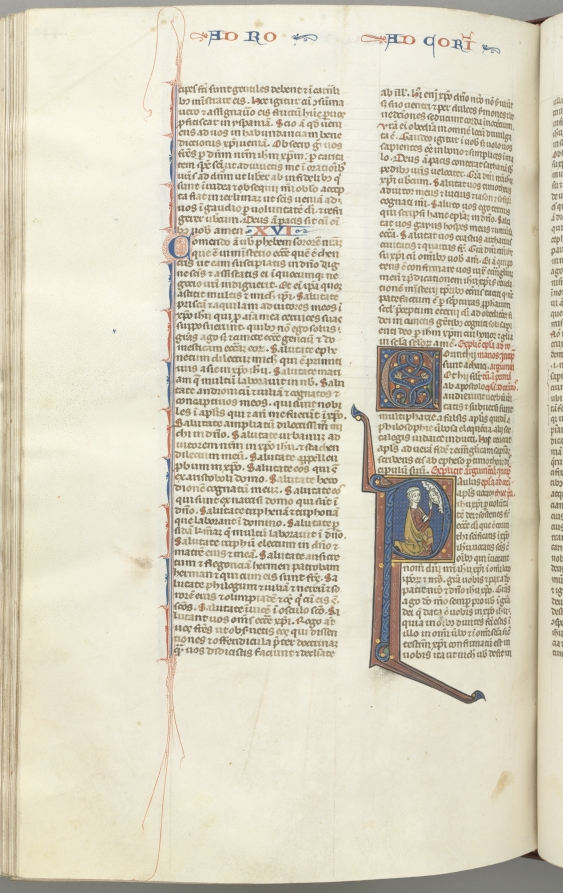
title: Fol. 440v, Corinthians I, historiated initial P, Paul kneeling talking to the bust of God above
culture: Southern France, Toulouse(?), 13th century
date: c. 1275–1300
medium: ink, tempera and gold on vellum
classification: Bound Volume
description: Biblical manuscripts were highly prized and important possessions of churches, monasteries, cathedral schools, and universities throughout medieval Europe. The biblical texts were known as the vulgate, the translations made by Saint Jerome in the fourth century from Hebrew and Greek into Latin, which became the definitive and official Latin version of the Roman Church. In the 13th century, the bible was, for the first time, produced as a single volume with an officially sanctioned sequence to its books and chapters as illustrated by this example. The very extensive decoration of this bible is arranged hierarchically to indicate the relative importance of the various texts so that full or almost full-page initials mark the openings of the first prologue, Genesis, and the first Gospel; historiated initials mark the beginning of each book and illuminated initials mark the Prologues.